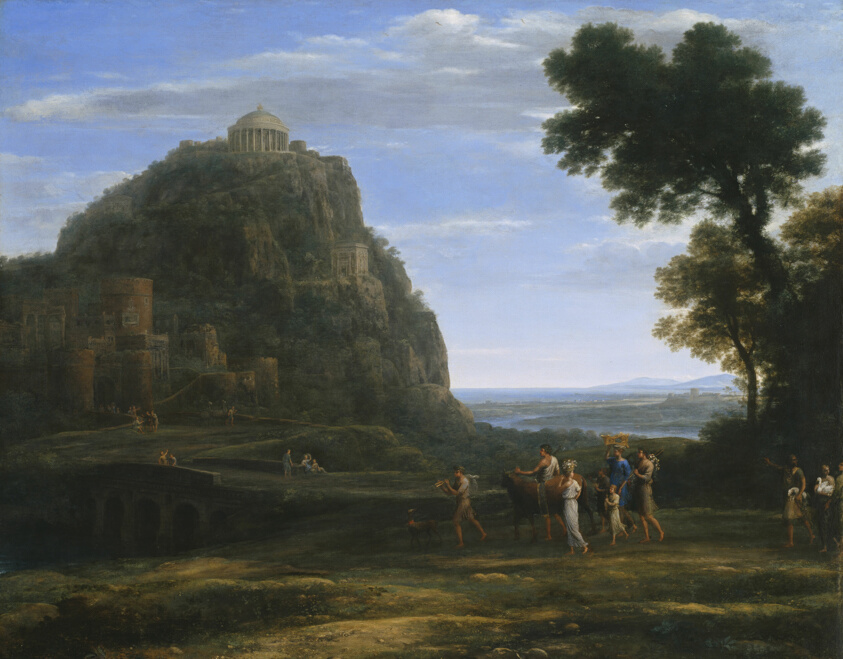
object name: Painting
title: View of Delphi with a Procession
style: Realism, 17th Century, Naturalism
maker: Claude Lorrain (Claude Gellée; French, 1600-1682)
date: 1673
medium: Oil on canvas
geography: France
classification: oil on canvas; oil; paint; painting; european painting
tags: landscape, procession, Greece, sky, river, paths, animals, cows, women, men, trees, figures, figure, classicism, classical, architechture, landscape architecture, landscapes